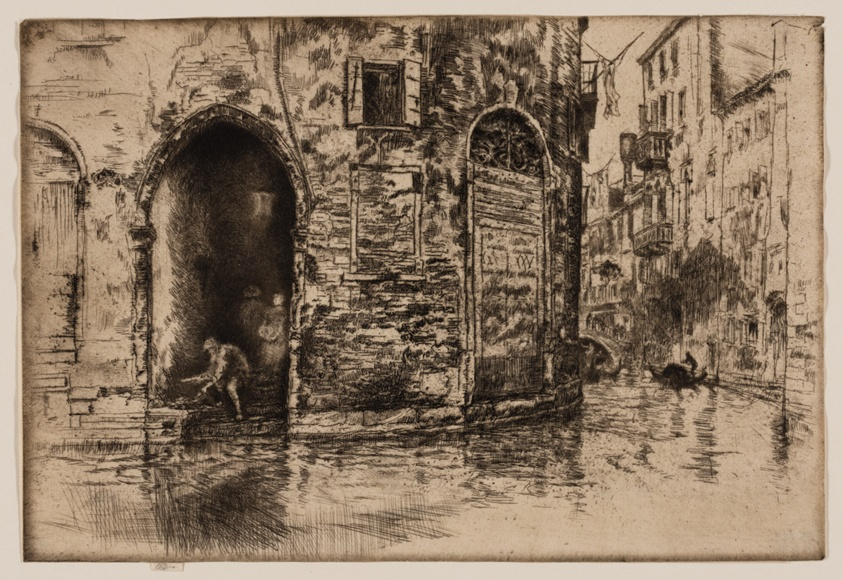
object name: Print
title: The Two Doorways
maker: James McNeill Whistler (American, 1834-1903)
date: 1879/80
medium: Etching and drypoint with foul biting in dark brown ink on off-white laid paper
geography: United States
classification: etching; foul biting; print; prints and drawing; drypoint; paper